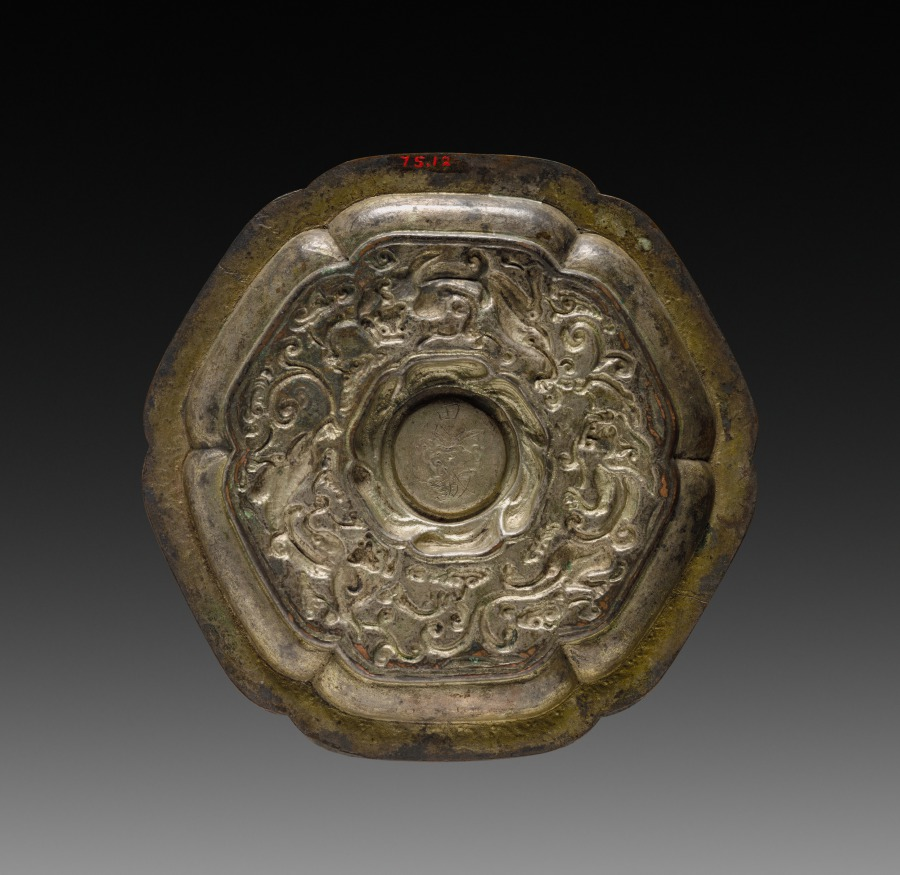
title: Cup Stand with Dragons amid Fungus Scrolls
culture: China, Yuan dynasty (1271-1368)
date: 14th Century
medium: silvered and gilt copper with repoussé design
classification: Metalwork